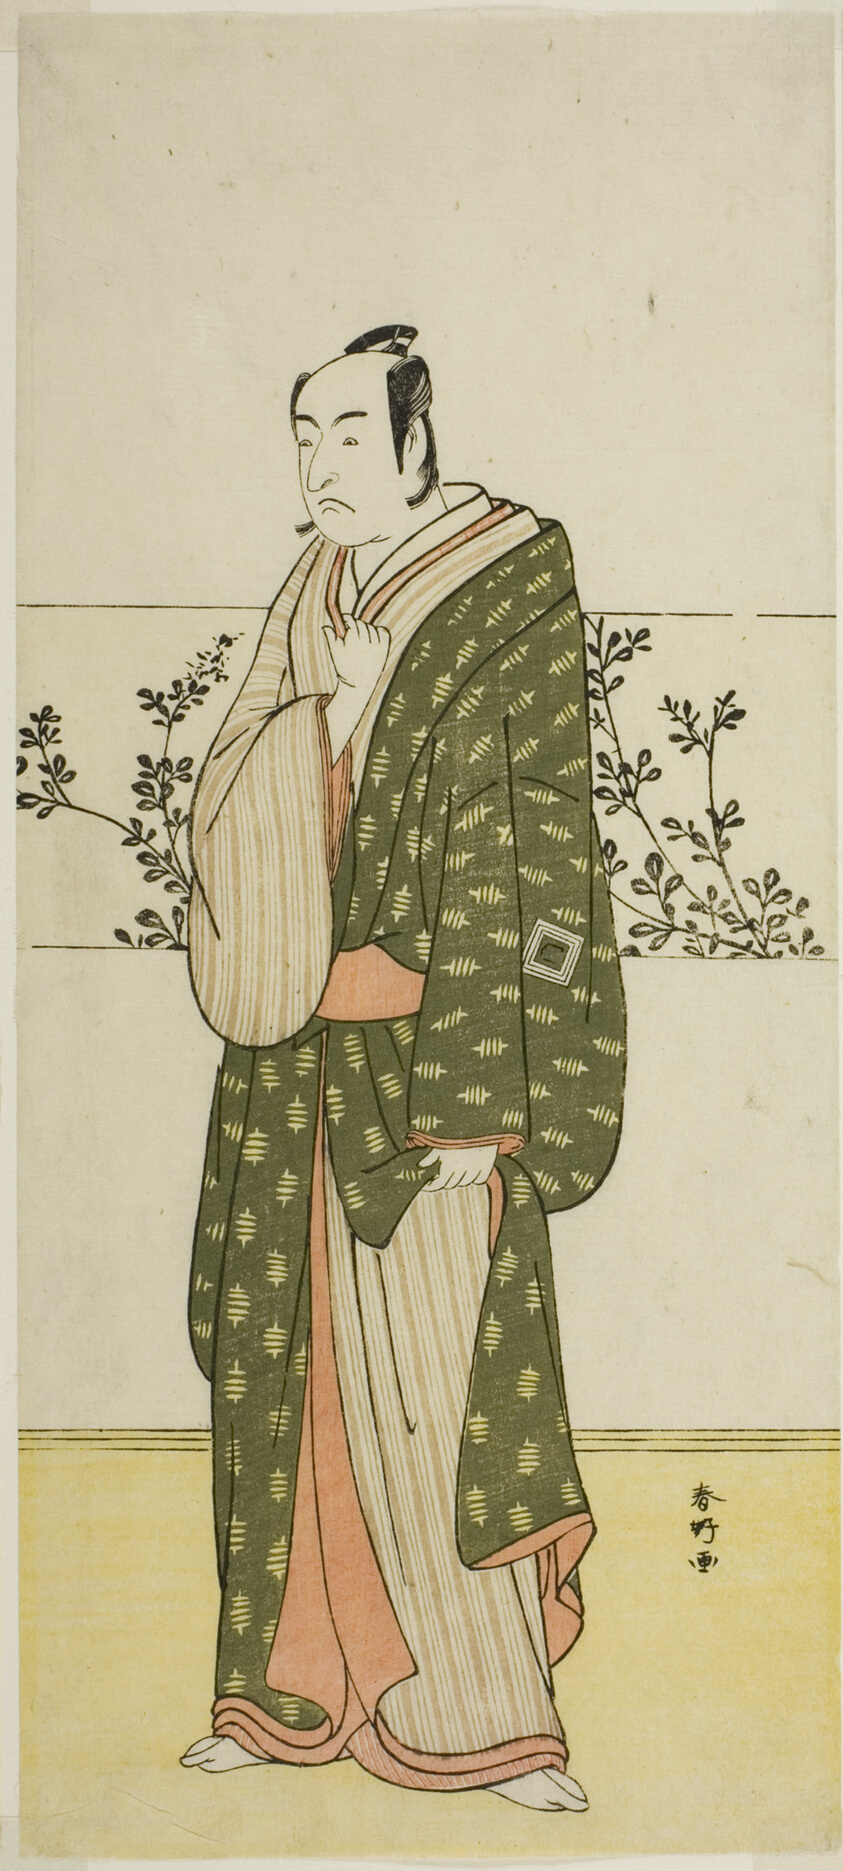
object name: Print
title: The Actor Ichikawa Monnosuke II, Possibly as Matsuya Soshichi, in the Play Chiyo no Hajime Ondo no Seto (Beginnings of Eternity: The Ondo Straits in the Seto Inland Sea) (?), Performed at the Kiri Theater from the Twenty-seventh Day of the Seventh Month, 1785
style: Japanese (culture or style)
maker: Katsukawa Shunko I; Japanese, 1743-1812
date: c. 1785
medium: Color woodblock print; hosoban; center sheet of triptych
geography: Japan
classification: woodblock print; print; asian art